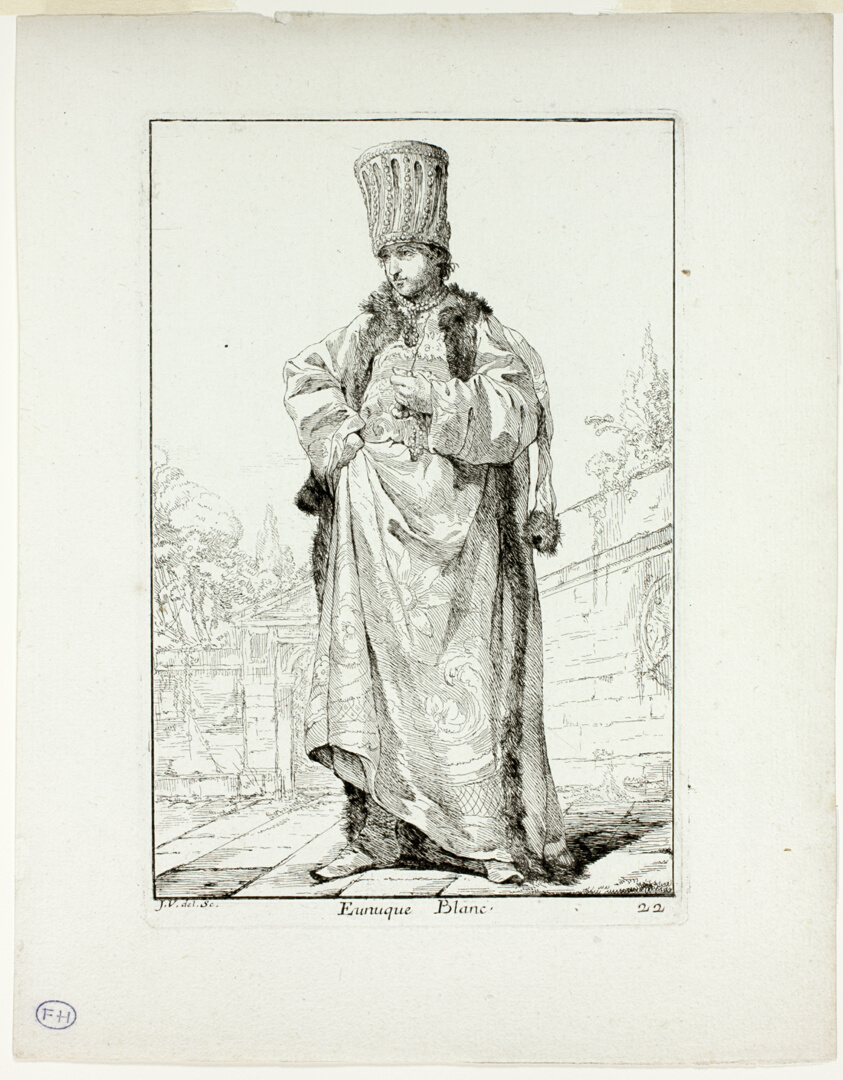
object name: Print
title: Eunuque Blanc, plate 22 from Caravanne du Sultan à la Mecque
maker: Joseph-Marie Vien, the elder; French, 1716–1809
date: 1748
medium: Etching on ivory laid paper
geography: France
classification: etching; paper; print; prints and drawing